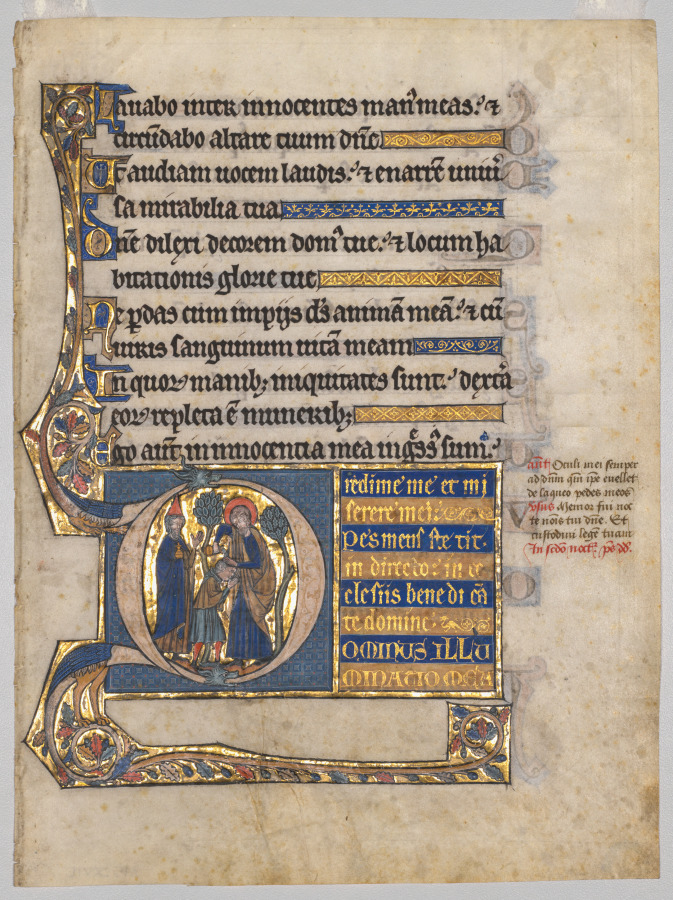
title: Single Leaf Excised from a Psalter: Initial D[ominus illuminatio mea] with Samuel Anointing David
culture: Northeastern France, 13th century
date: c. 1270–1290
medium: ink, tempera, and gold on vellum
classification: Manuscript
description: This historiated initial serves as a visual lead to Psalm 26, which begins with the last two lines of the page: Dominus illuminatio mea (The Lord is my light). By setting the body of the initial against a blue diapered (patterned) background for chromatic effect, the artist observed the latest fashion in book illumination.